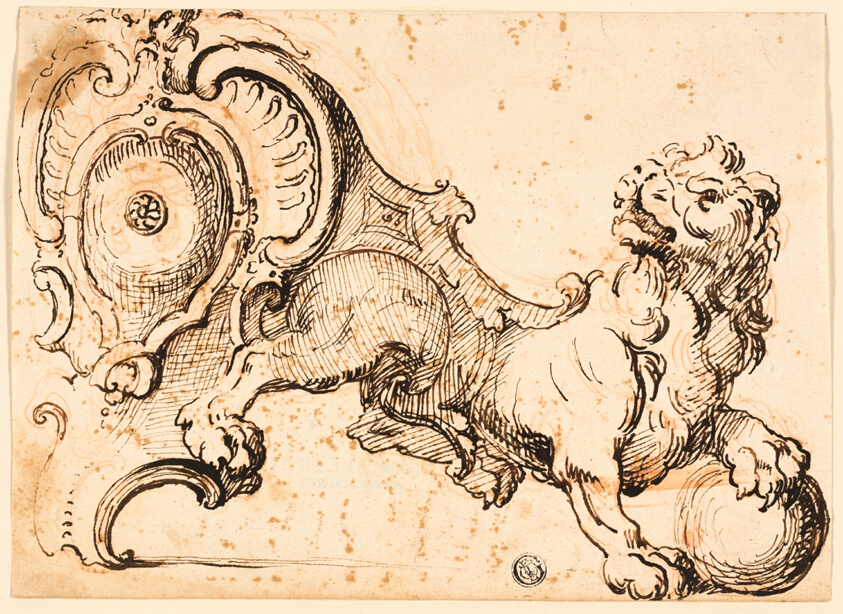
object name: Drawing and Watercolor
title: Design for an Andiron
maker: Unknown Artist; European, 18th century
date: 18th century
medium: Pen with brown and black ink, with red chalk, on ivory laid paper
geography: Spain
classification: pen and ink drawings; drawings (visual works); prints and drawing